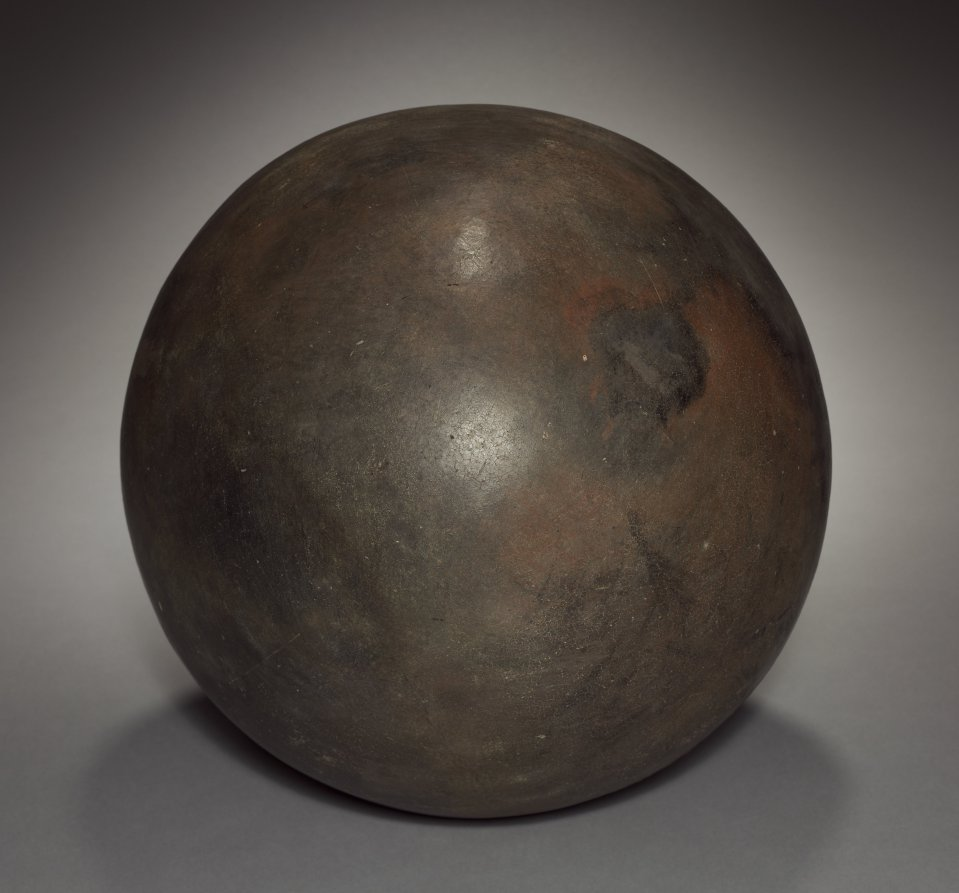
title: Vessel with Oculate Being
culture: Peru, South Coast, Paracas (Cavernas) style (700 BCE–1 CE)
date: 300 BCE–1 CE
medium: earthenware with resin-based paint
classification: Ceramic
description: A supernatural creature known today as the Oculate Being, after its huge eyes, became prominent late in Paracas times. The Paracas left no written records and this creature's meaning is poorly apprehended, but it clutches a severed human head by the hair. A hint of the head's significance comes from the Oculate Being itself, whose head sprouts streamers that may represent abstract energy or force. The severed head cult, then, may have aimed at capturing and redirecting this energy. (Other Paracas objects appear nearby.)